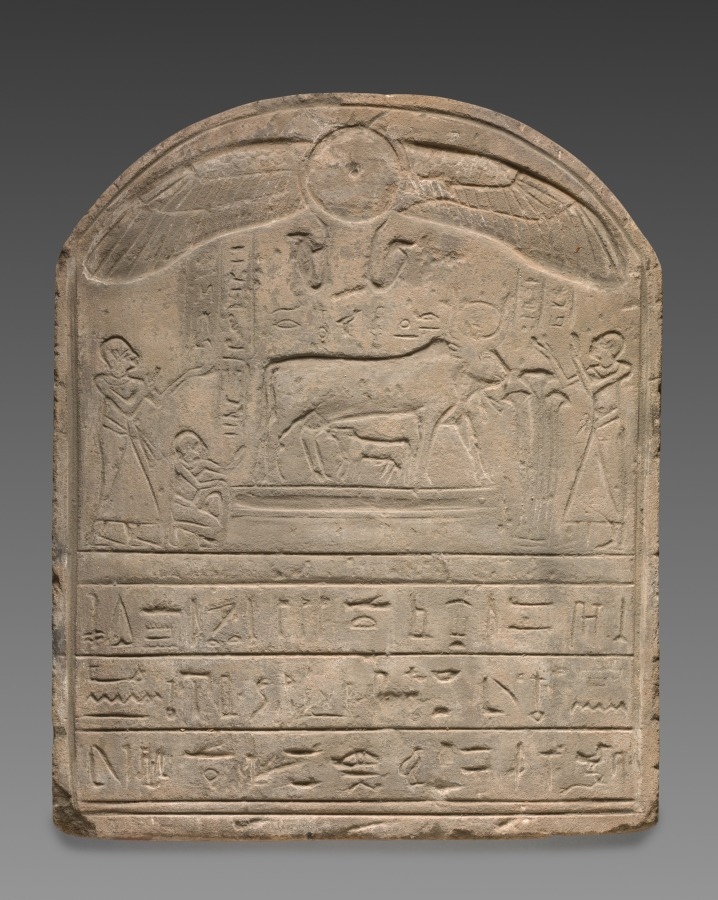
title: Round-Topped Stele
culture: Egypt, Greco-Roman period (332 BCE–395 CE) or modern forgery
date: 332 BCE–395 CE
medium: sandstone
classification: Sculpture